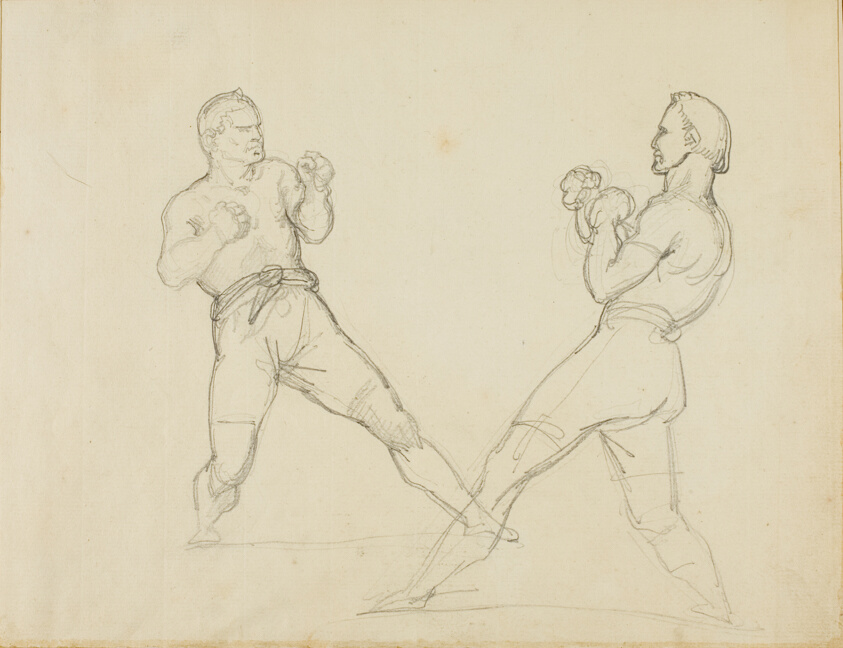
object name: Drawing and Watercolor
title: Two Boxers Sparring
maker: Jean Louis André Théodore Géricault (French, 1791-1824)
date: 1818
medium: Graphite, on cream laid paper, perimeter mounted on cream wove paper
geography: France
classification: graphite; drawings (visual works); prints and drawing